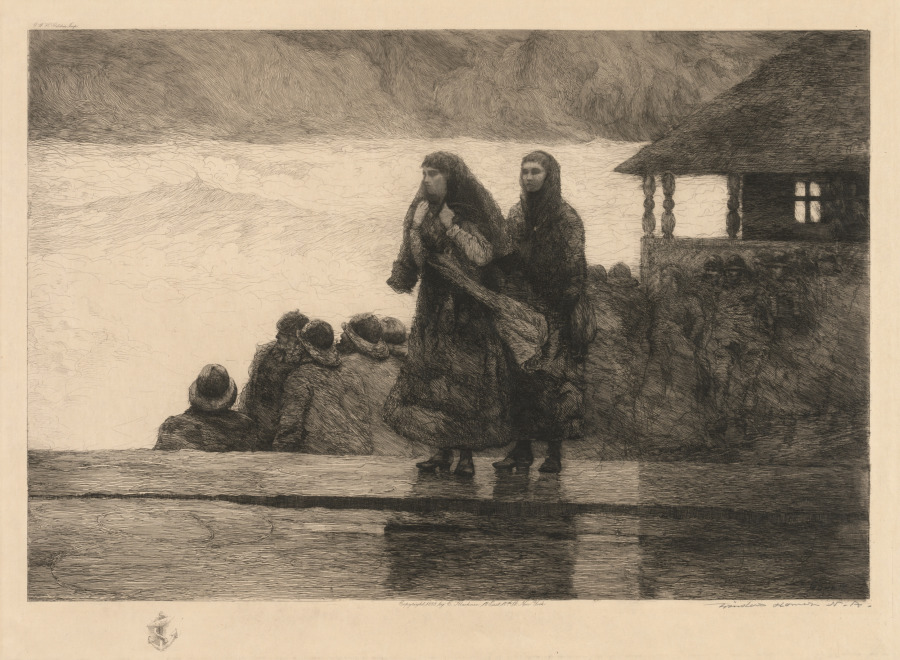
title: Perils of the Sea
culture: America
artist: Winslow Homer (American, 1836–1910)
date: 1888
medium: etching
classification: Print